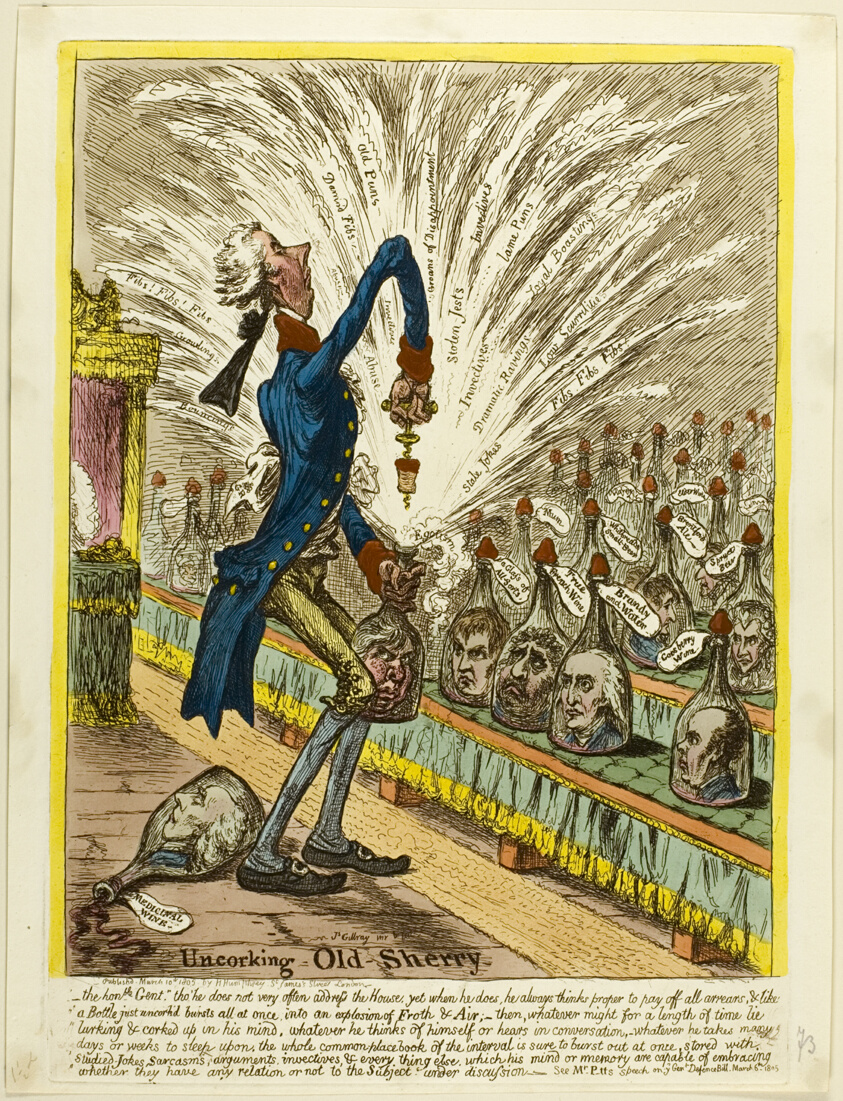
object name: Print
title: Uncorking Old Sherry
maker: James Gillray (English, 1756-1815); published by Hannah Humphrey (English, c. 1745-1818)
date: published March 10, 1805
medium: Hand-colored etching on paper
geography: England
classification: etching; print; prints and drawing